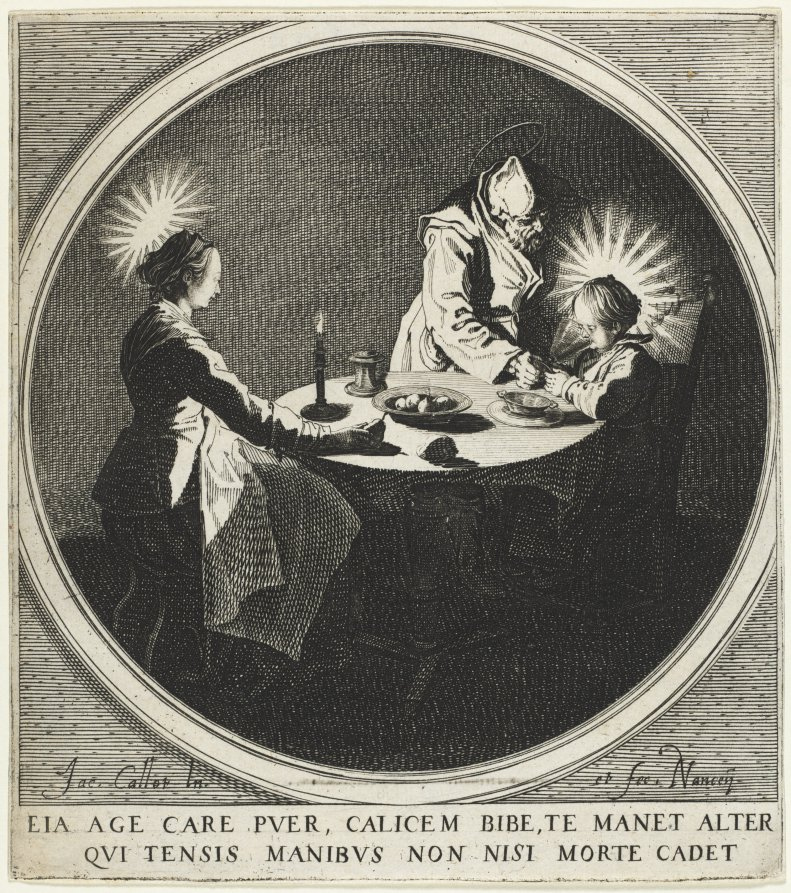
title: The Blessing (Le Bénédicité) also known as The Holy Family at Table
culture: France, 17th century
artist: Jacques Callot (French, 1592–1635)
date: 1628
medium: etching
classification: Print